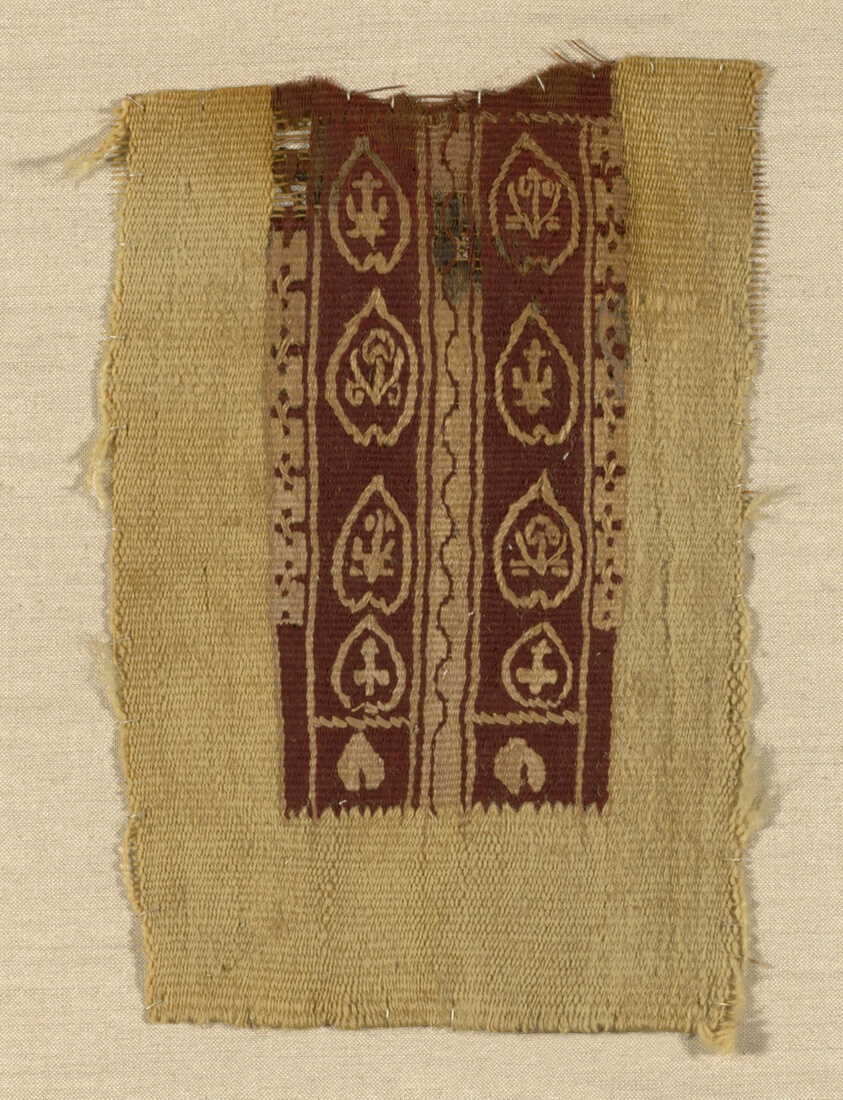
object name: Textile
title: Band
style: roman period (egyptian)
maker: Coptic (Egypt)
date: Roman period (30 B.C.– 641 A.D.), 5th/6th century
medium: Linen and wool, tapestry weave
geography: Egypt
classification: textile; weaving